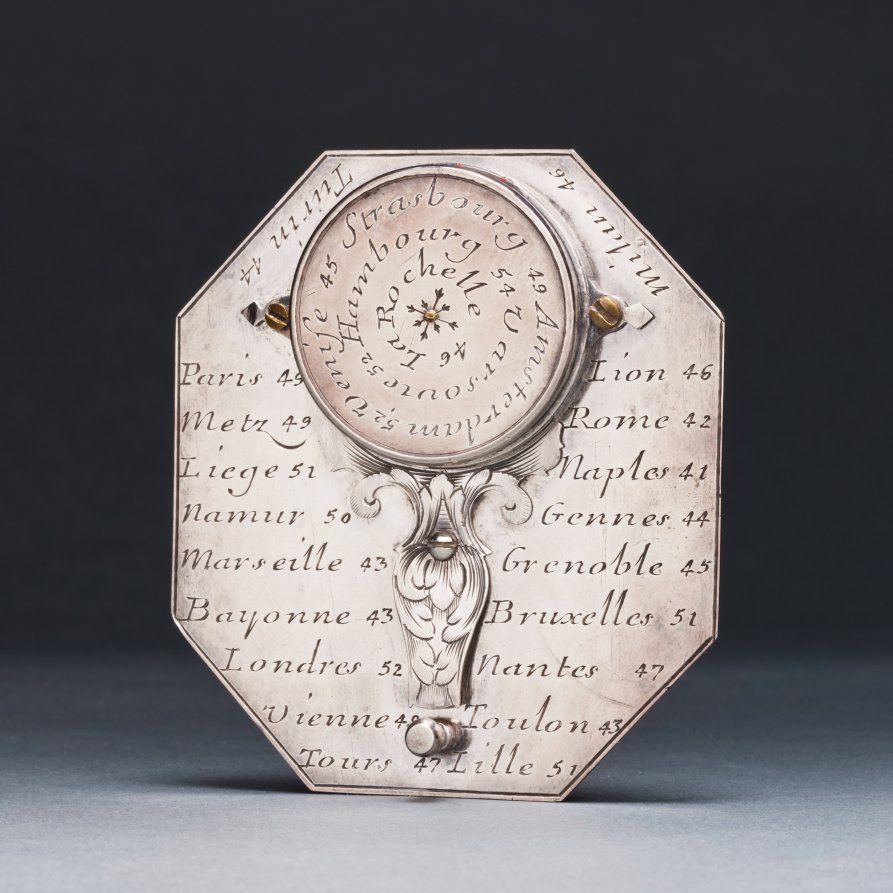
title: Butterfield Sundial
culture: France, 18th century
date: 1700s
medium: silver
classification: Silver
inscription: [Engraved signature above the compass in ribbon band]: "N. BION A Paris"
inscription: [Engraved on the face of the sundial]: “Pour 55° 4-5-6-7-8-9-10-11 50° IIII-V-VI-VII-VIII-IX-X-XI 45° 5-6-7-8-9-10-11 40° -VI-VII-VIII-IX-X-XI'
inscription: [Engraved on the other side]: "Pour 55° -8-7-6-5-4-3-2-1-0 50°-VIII-VII-VI-V-IIII-III-II-I 45°-8-7-6-5-4-3-2-1 40°-VII-VI-V-IIII-III-II-I"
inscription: [Engraved around the compass]: “NORD-OUEST-SUD-EST”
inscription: [Engraved on the back of the sundial]: “Turin 44 Milan 46 Paris 49 Lion 46 Metz 49 Rome 42 Liege 51 Naples 44 Namur 50 Gennes 44 Marseille 43 Grenoble 45 Bayonne 43 Bruxelle 51 Londres 52 Nantes 47 Vienne 48 Toulon 43 Tours 47 Lille 51”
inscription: [Engraved around the back of the compass]: “Venise 45 Strasbourg 49 Amsterdam 52 Hambourg 54 Varsovie 52 La Rochelle 46”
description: Butterfield-type sundials are characterized by their adjustable gnomons, metal flaps that cast a shadow on the dial’s face to indicate the hour, and geographical indices. This sundial has a scale adjustable between latitudes of 40° to 60° north. The latitudes of 26 European towns are engraved on its back for quick reference. With an intricately engraved silver face, it would have functioned as a fashionable traveler’s accessory.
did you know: Butterfield-style sundials were named after Micheal Butterfield, an English scientific and mathematical instrument maker who worked in Paris between 1674 and 1724.